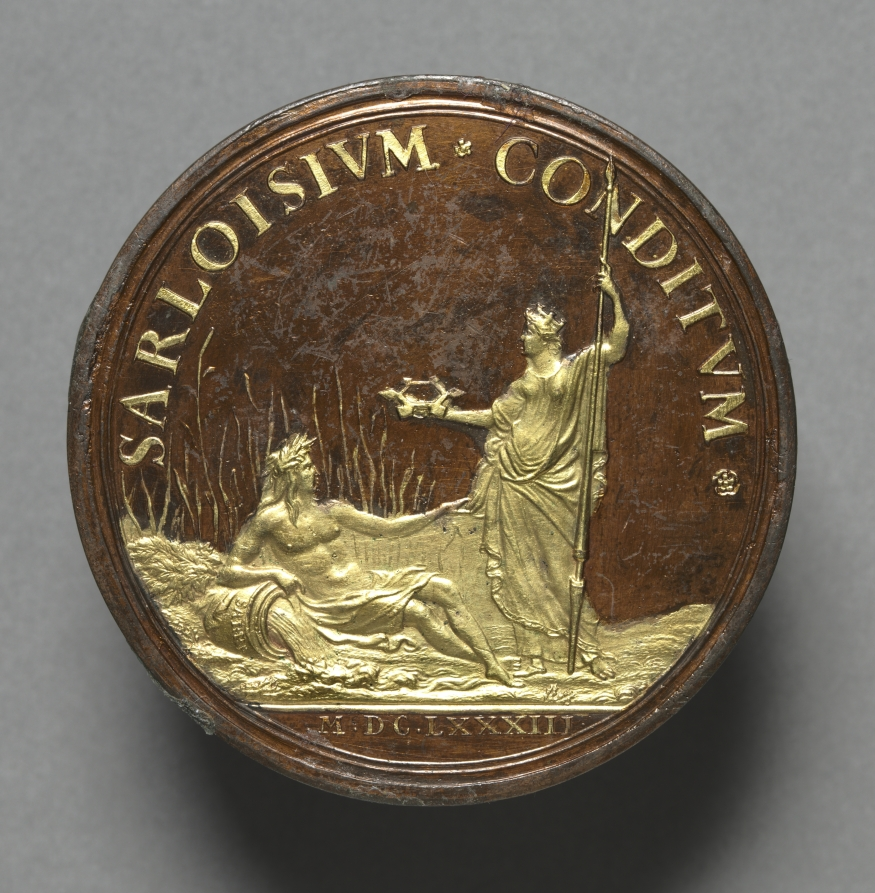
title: Medal Commemorating the Founding of Saarlouis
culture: France, 17th century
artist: Joseph Roettiers (Flemish, 1635–1703)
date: 1688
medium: bronze, partially gilded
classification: Sculpture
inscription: inscribed along circumference: Ludovicus. Magnus. Rex. Christianiss"; inscribed: JR [monogram].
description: Saarlouis is a city in Saarland, Germany, and this medal commemorates the founding of the fortress and city in 1680 by King Louis XIV of France. The establishment of Saarlouis was one of many actions taken by the king to fortify the new border between Germany and France. This particular medal is one of a large series that composes a medallic history of the reign of Louis XIV, issued at various intervals during his reign.